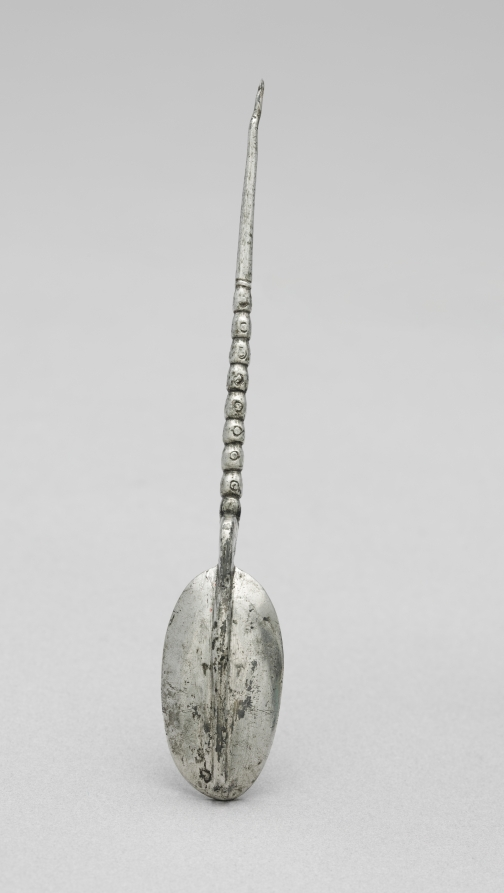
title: Spoon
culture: Byzantium, Syria(?), Byzantine period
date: 300s CE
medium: silver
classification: Metalwork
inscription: Greek inscription the center of the bowl.